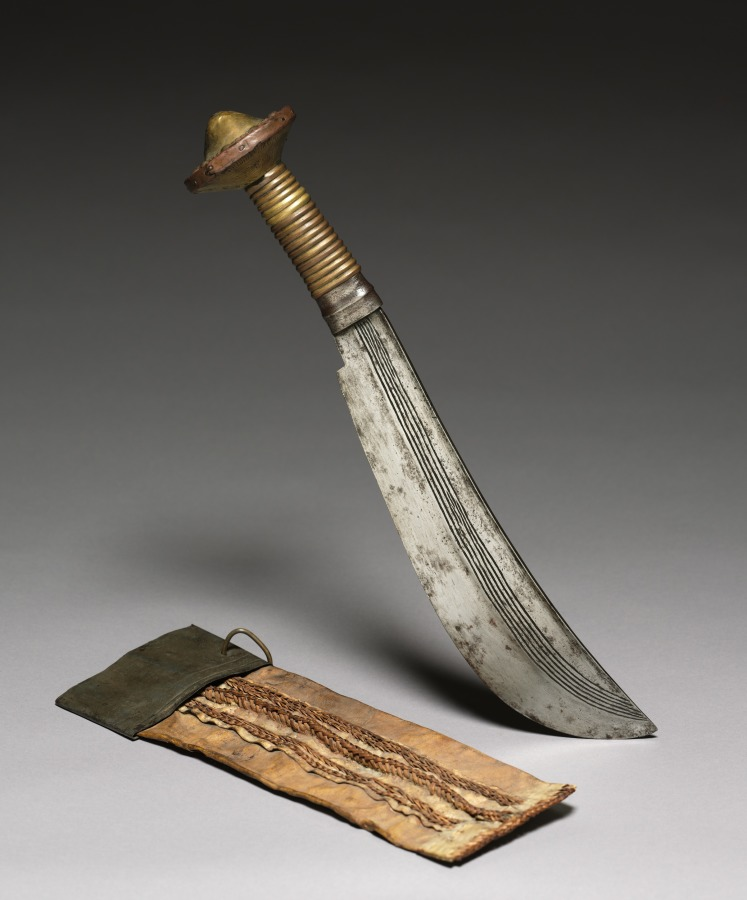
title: Knife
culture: Africa, Central Africa, Democratic Republic of Congo, unknown maker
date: 1800s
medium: Iron, wood, copper alloy, metal, rawhide, and plant fiber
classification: Arms and Armor